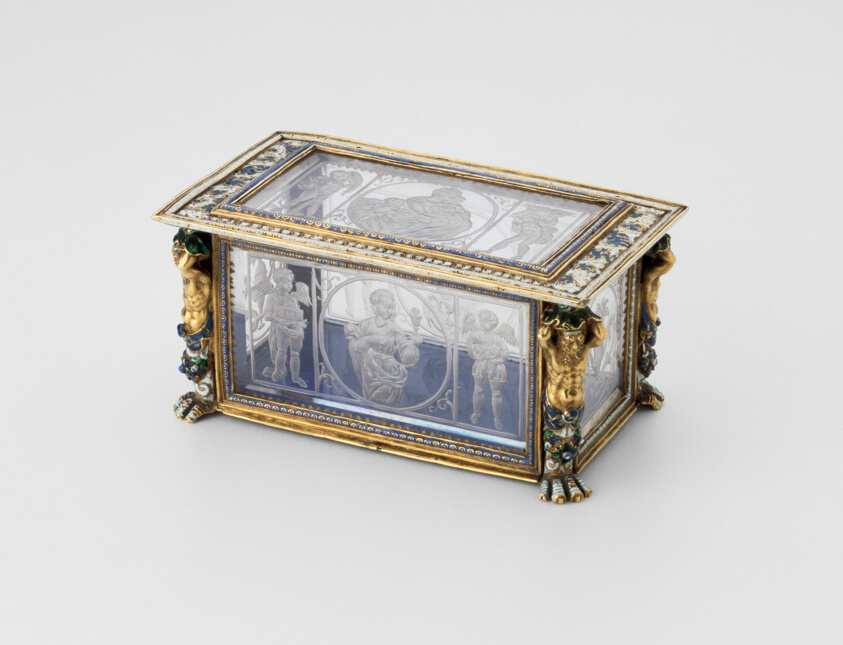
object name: Decorative Arts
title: Casket with the Three Theological Virtues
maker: Italian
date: c. 1525-c. 1550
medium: Gold, enamel, rock crystal, and lapis lazuli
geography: Northern Italy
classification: jewelry; european decorative arts; decorative arts